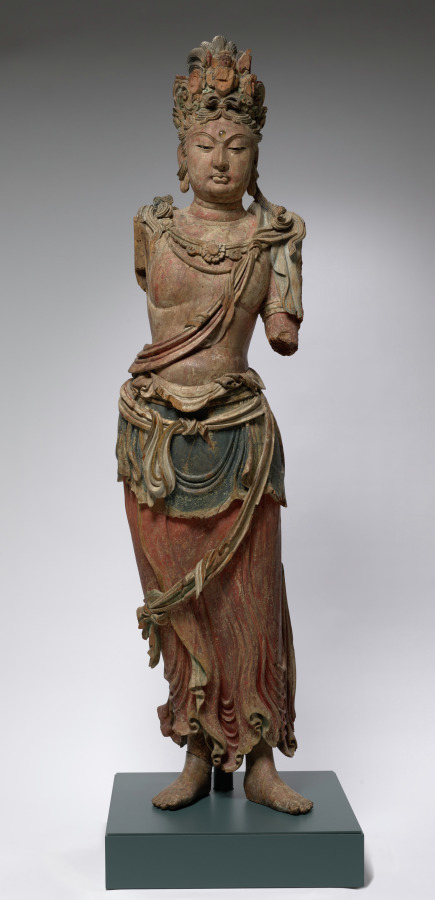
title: Eleven-Headed Guanyin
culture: China, late Northern Song dynasty (960-1127) - Jin dynasty (1115-1234)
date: 1100–1200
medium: wood with polychromy and cut gold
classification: Sculpture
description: The bodhisattva is an enlightened being dedicated to the spiritual awakening of all beings. The compassionate bodhisattva Guanyin, in a variety of manifestations, is probably the most popular deity of worship in Chinese Buddhism. In the Esoteric Buddhist form shown here, this standing Guanyin has a total of eleven heads, with smaller ones above the principal head. The uppermost head represents the Buddha Amitabha, to whom he is closely related. The eleven heads symbolize the Buddha’s steps on the path to enlightenment.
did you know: This Guanyin is carved from a single block of willow (genus Salix sp.).